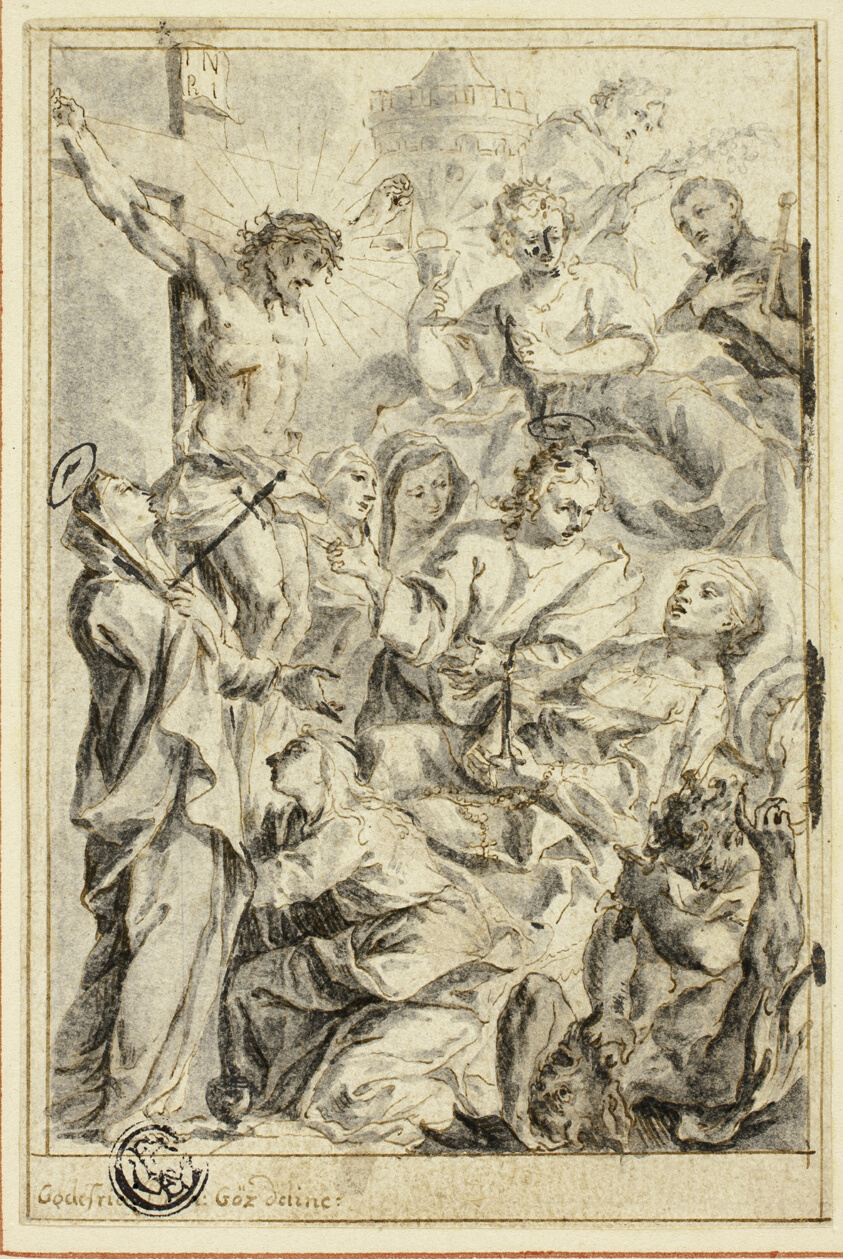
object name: Drawing and Watercolor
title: Dying Man Being Consoled by Christ on the Cross, Virgin and Saints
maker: Gottfried Bernhard Goetz (German, 1708-1774)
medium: Pen and brown ink, with brush and gray and black wash, later additions in pen and black ink and heightened with touches of lead white (discolored) on ivory laid paper, mounted on cream wove paper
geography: Germany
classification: ink or chalk wash; drawings (visual works); prints and drawing